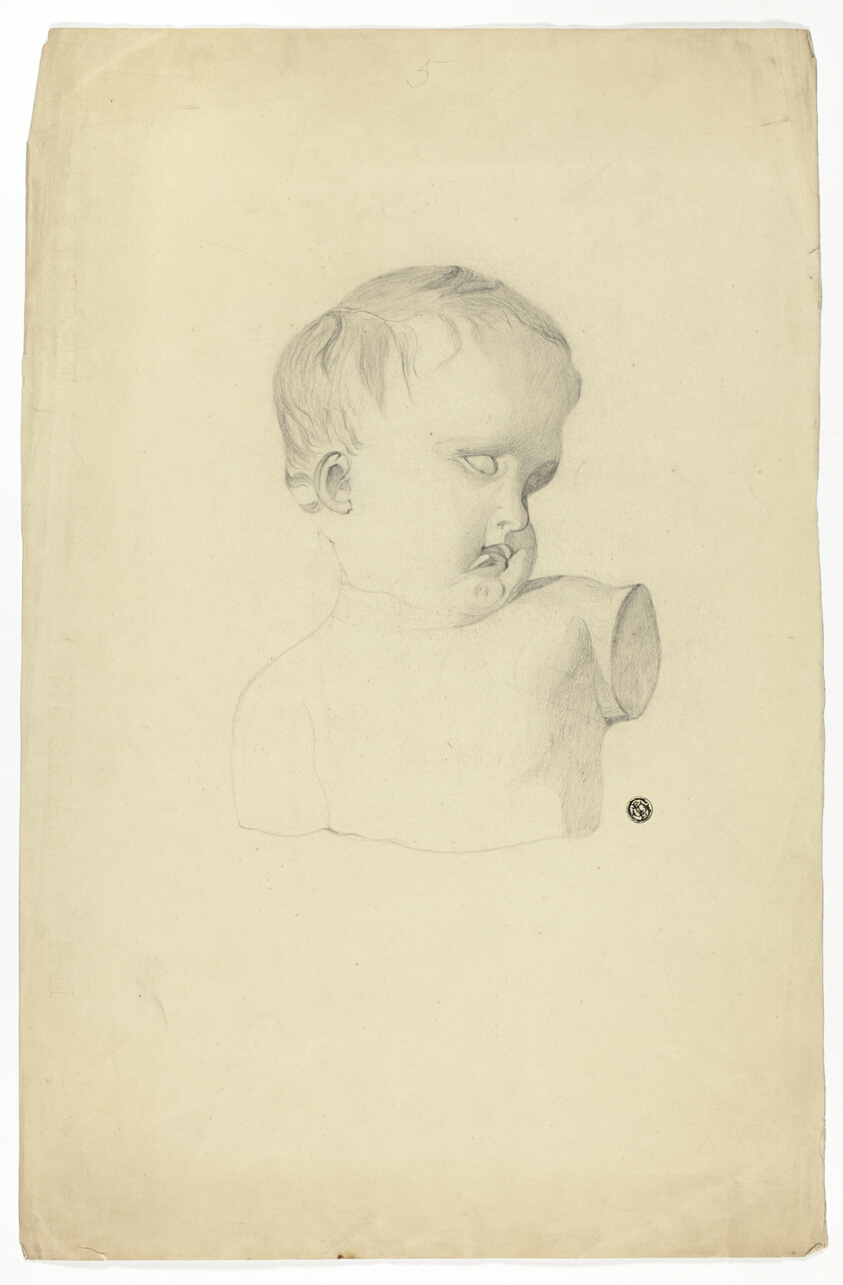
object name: Drawing and Watercolor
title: Fragment of Bust of Child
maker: Unknown Artist; European, possibly 19th century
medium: Graphite on cream wove paper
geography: Europe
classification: graphite; paper; drawings (visual works); prints and drawing